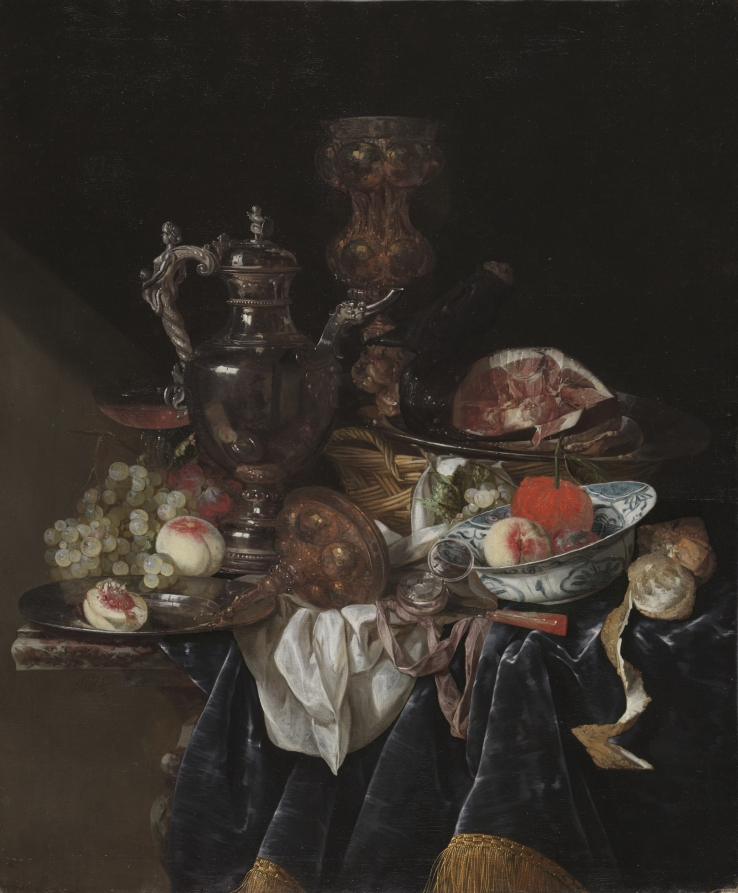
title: Silver Wine Jug, Ham, and Fruit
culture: Netherlands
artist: Abraham van Beyeren (Dutch, 1620/21–1690)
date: c. 1660–66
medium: oil on canvas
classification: Painting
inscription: Signed lower left: "AVB g. [monogram]"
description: With their typically large scale, and loose and energetic brushwork, Abraham van Beyeren’s opulent still life paintings were designed to be seen from a slight distance—perhaps installed over a mantelpiece. Here, for example, the silver wine jug is painted with rough strokes that seem almost abstract when viewed up close, but from a distance it becomes a fully realized object shimmering with complex reflections—including a ghostly self-portrait of the artist at his easel.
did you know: Look closely: the shimmering surface of the silver wine jug reflects a portrait of the artist at his easel.